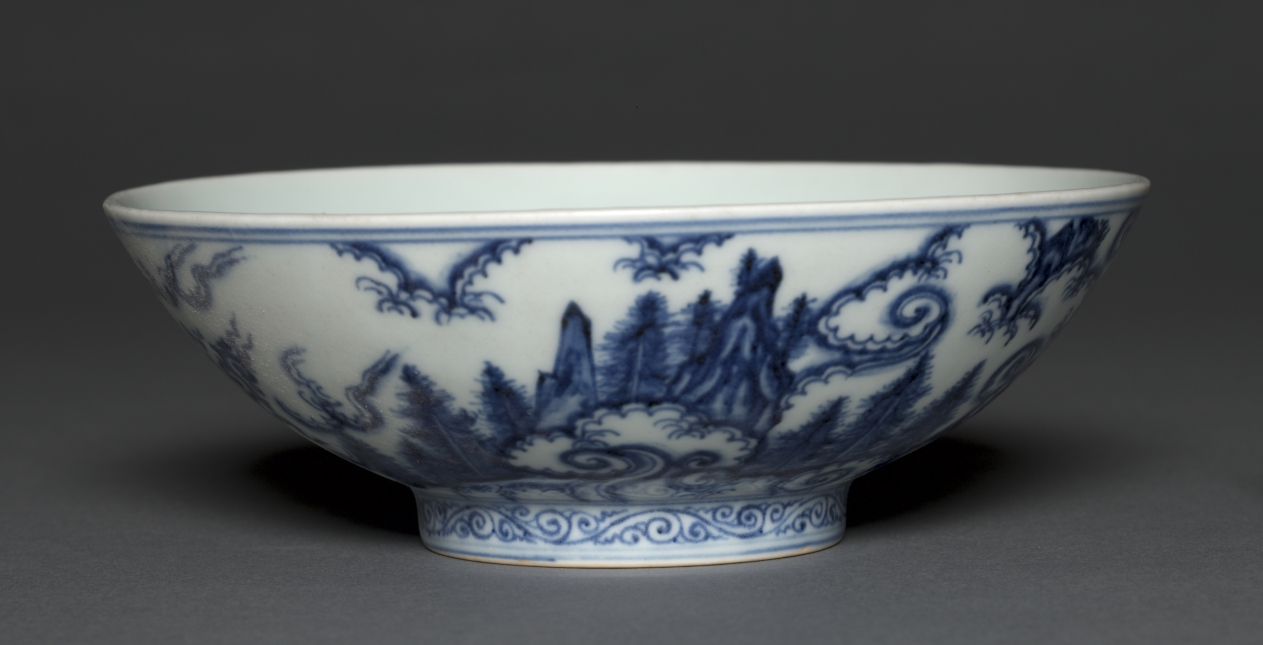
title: Bowl with "Land of Daoist Immortals" Scene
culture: China, Ming dynasty (1368-1644), Xuande mark and reign (1426-35)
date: 1426–35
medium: porcelain with underglaze blue decoration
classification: Ceramic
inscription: 大明宣德年製